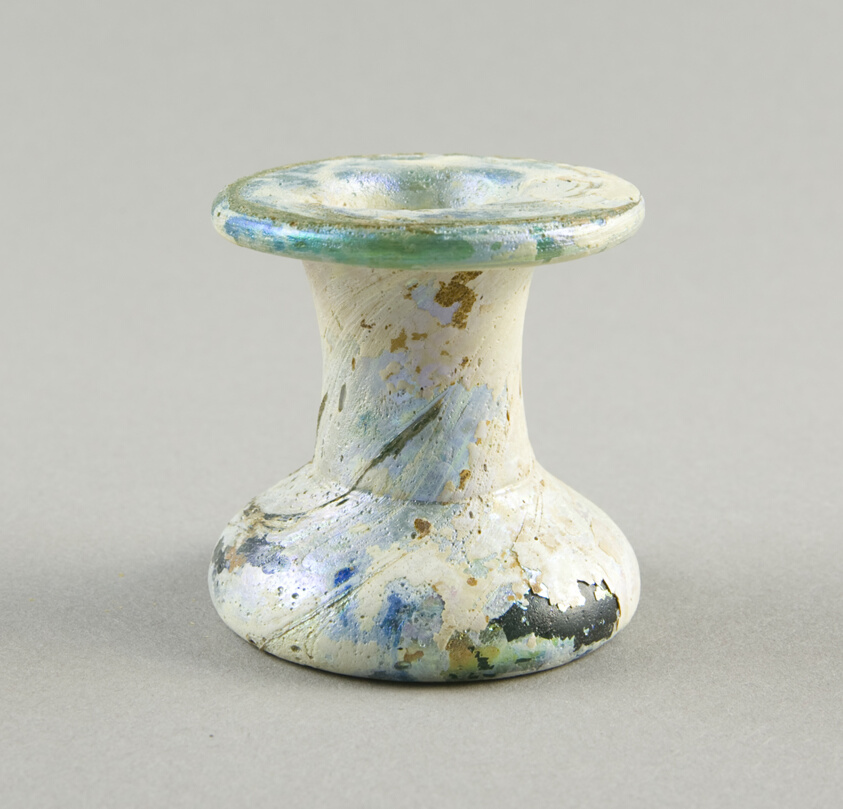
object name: Vessel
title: Jar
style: syrian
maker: Roman; Levant or Syria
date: 1st century (?)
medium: Glass, blown technique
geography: Syria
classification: glass; vessel; ancient art